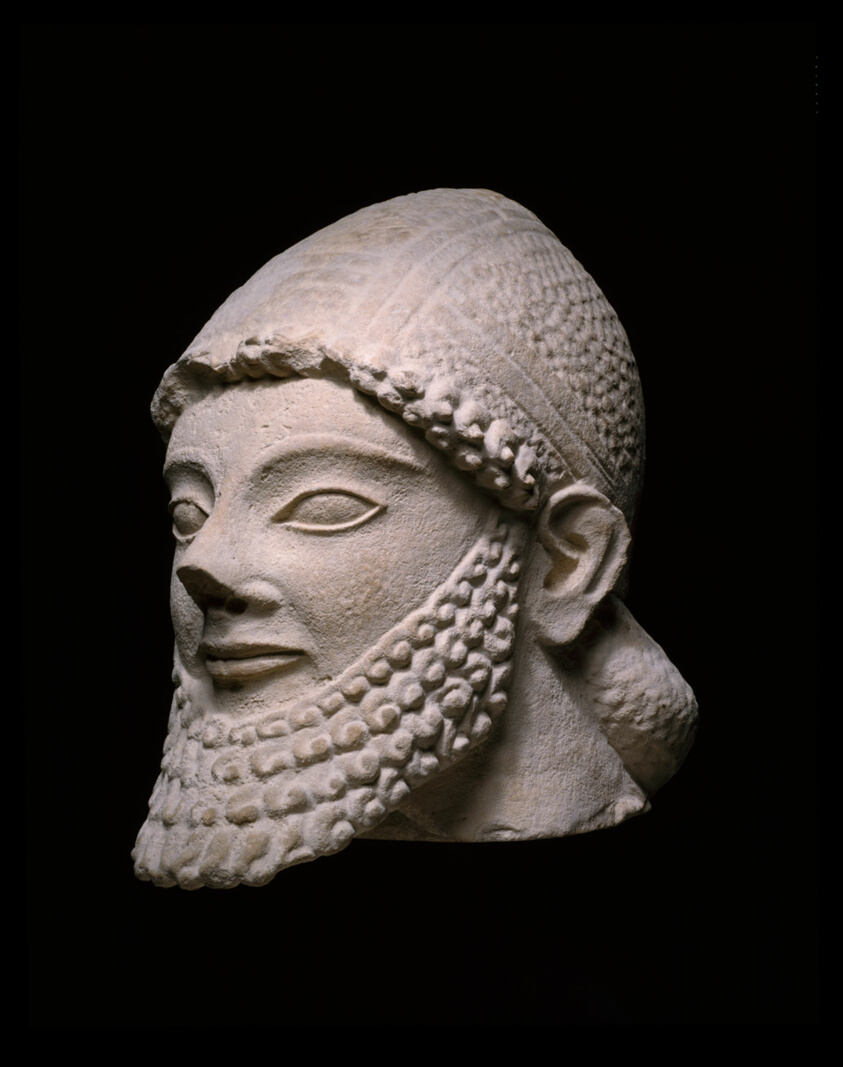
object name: Sculpture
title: Head of a Bearded Man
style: early cypriote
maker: Cypriot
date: 5th century BCE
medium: Limestone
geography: Cyprus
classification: stone; sculpture; ancient art